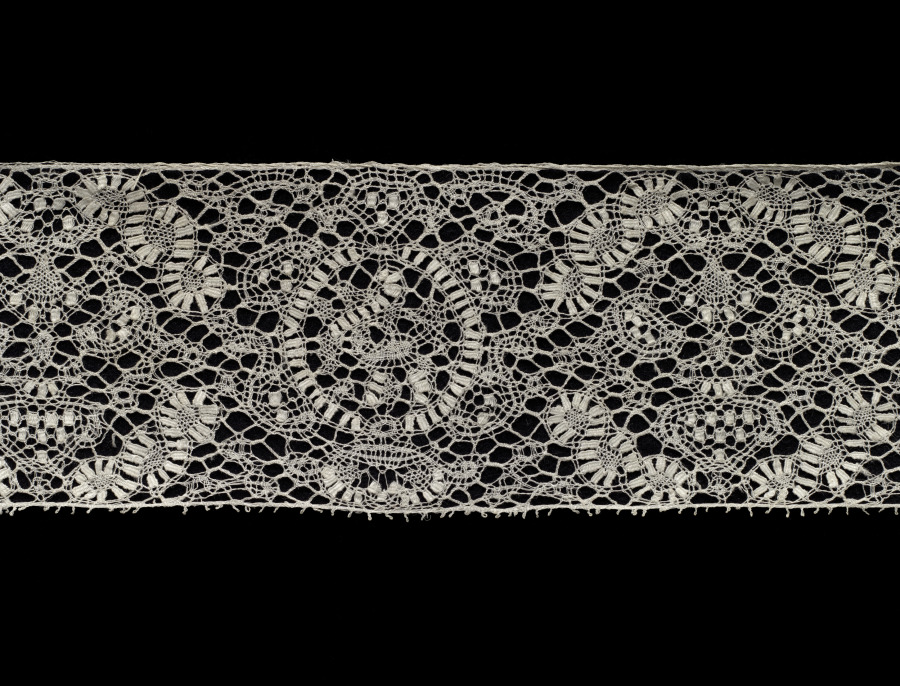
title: Lace Edging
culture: Belgium, Binche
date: 1700s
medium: Linen: bobbin lace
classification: Lace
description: The design of this piece of lace is similar to three other pieces of lace in CMA's collection—1945.86–88.